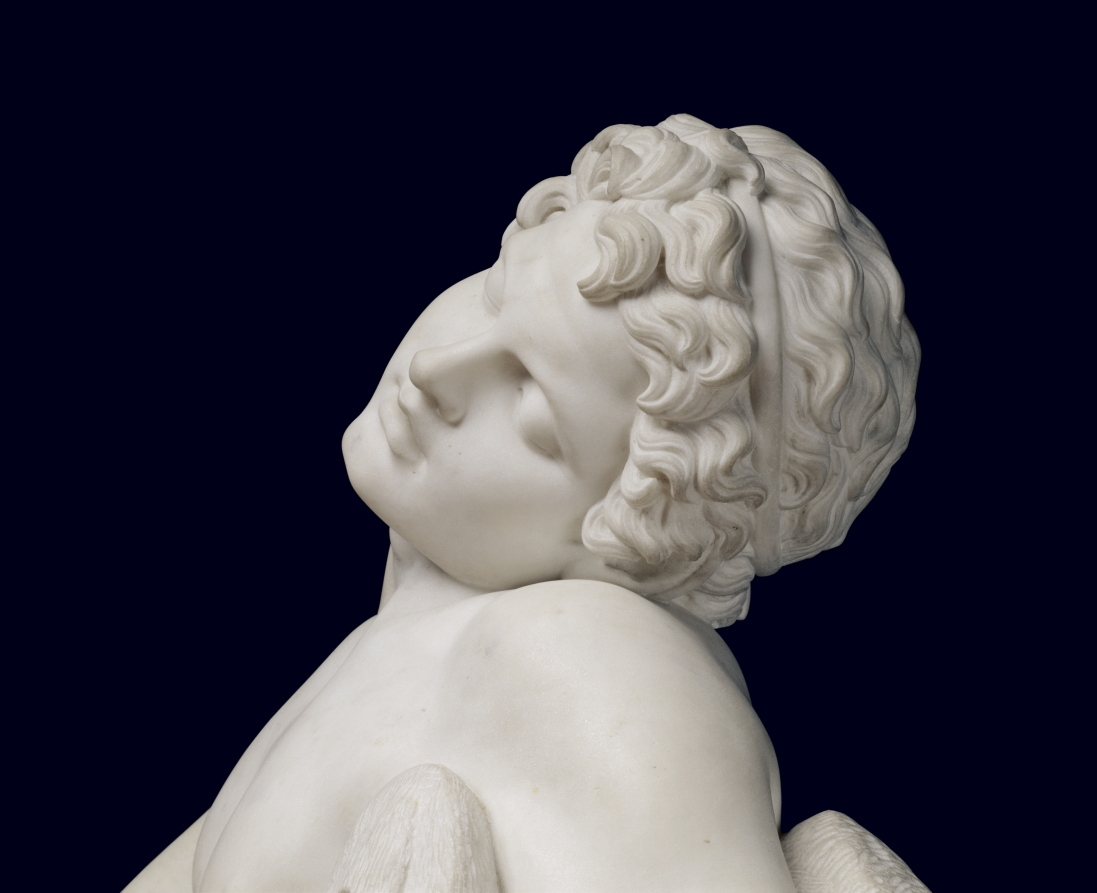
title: The Sleeping Faun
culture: America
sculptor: Harriet Goodhue Hosmer (American, 1830–1908)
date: modeled 1864, carved c. 1870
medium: marble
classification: Sculpture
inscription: Signed and inscribed on base: "H HOSMER Fecit -- Romae"; titled on base: "THE SLEEPING FAUN"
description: Hosmer is the best known female member of a large group of American artists working in Italy during the mid-1800s. The Sleeping Faun, a depiction of a pointed-eared woodland spirit, demonstrates her mastery of the neoclassical style, which was inspired by the art of ancient Greece and Rome. Hosmer’s playful sense of humor infuses the composition: a half-human, half-goat satyr mischievously ties the unwitting faun’s animal skin garment to a tree stump.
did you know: Hosmer said, "I honor every woman who has strength enough to step out of the beaten path. . . ."